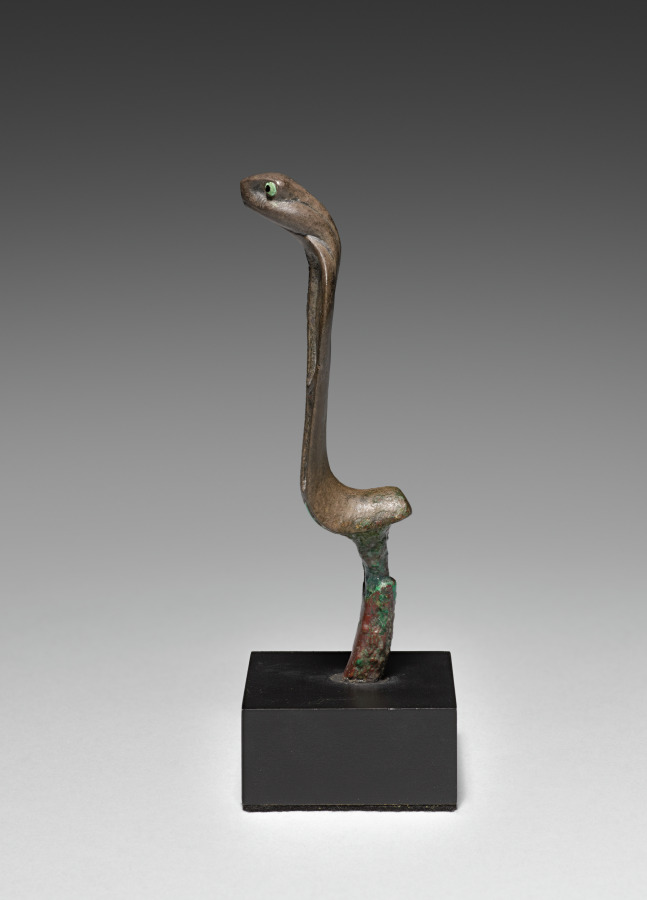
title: Uraeus (Rearing Cobra)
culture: Egypt, New Kingdom (1540–1069 BCE), Dynasty 19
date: 1307–1196 BCE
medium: Silver-copper alloy with inlays (copper, feldspar, turquoise, obsidian?) and gilding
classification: Metalwork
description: Made from a silver-copper alloy, this rearing cobra likely served as a uraeus, symbolizing royal or divine power in ancient Egypt. Its lowermost portion likely fit into the top of the head of a large sculpture, while its body and tail seem cut short, perhaps making room for a solar disk to rise up behind. The eyes are inlaid, and six cavities for additional inlay remain on the expanded hood, the lowermost still intact, the others likely once filled with brightly colored blue and red stone. Much of the remaining surface may once have been gilded, to judge from remaining traces of gold on the back.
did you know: The word uraeus comes from an Egyptian term for “rising/rearing up,” describing the cobra’s position.